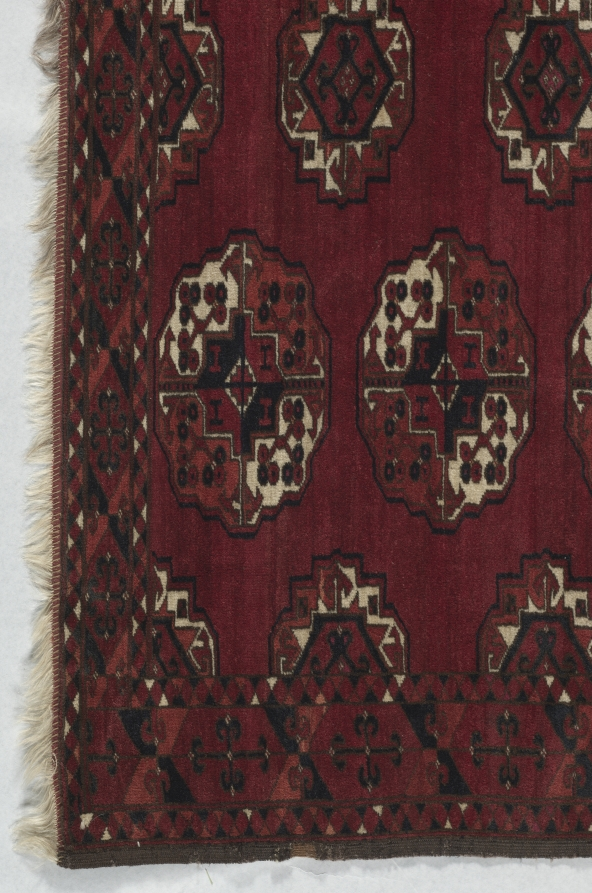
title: Turkmen Main Carpet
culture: Turkmenistan or Afghanistan, Saryk tribe, 19th century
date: 1870s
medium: Wool, silk; 171 symmetrical (Turkish) knots per square inch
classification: Carpet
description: Traditionally woven by women and girls, carpets are identified by fiber content, color, weave, and especially the type of rug knot-diagnostic features that are more reliable than designs. This rare carpet is admired for its brilliant color, lustrous wool, and spacious drawing. The main gul, or lobed motif, with three distinctive clover-leaf devices in each quadrant was a hallmark of the esteemed Salor tribe and often copied by other Turkmen tribes. The minor gul and the main border design were also duplicated. Only the minor borders with triangles in contrasting colors are Saryk hallmarks.